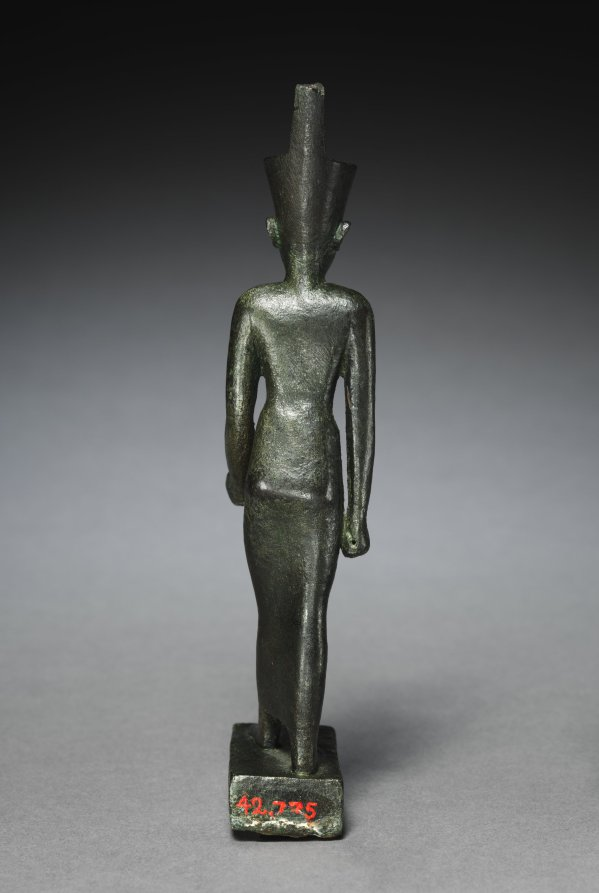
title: Statuette of Neith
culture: Egypt, Greco-Roman period (332 BCE–395 CE), Ptolemaic dynasty (305–30 BCE)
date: 305–30 BCE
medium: bronze, solid cast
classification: Sculpture